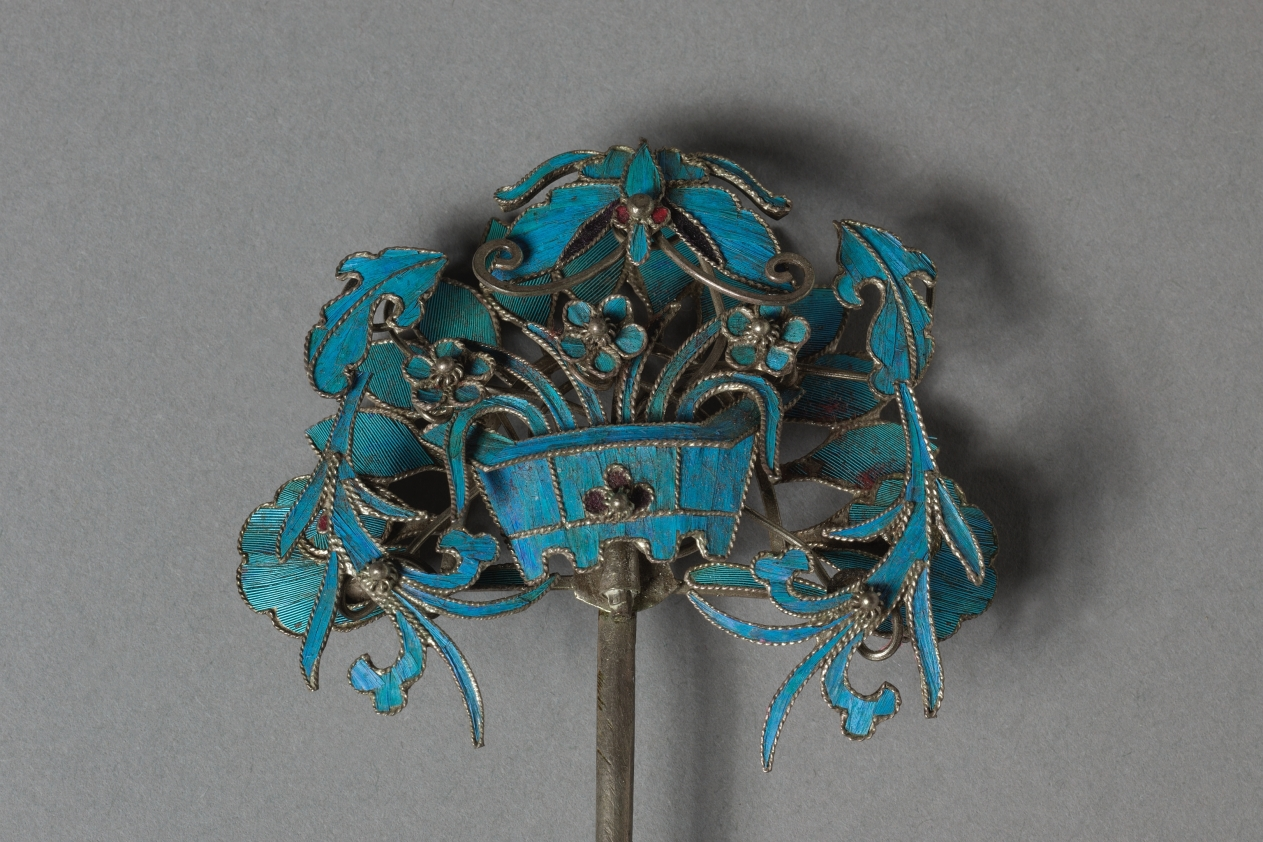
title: Headdress Ornament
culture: China, Qing dynasty (1644-1911)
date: 1800s–1900s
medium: Copper-silver alloy, gilding, kingfisher feathers, glass beads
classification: Jewelry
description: Hair ornaments depicting flowers, butterflies, or birds were worn by ladies of the Manchu elite class.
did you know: The iridescent blue feathers of kingfisher birds are inlaid in hairpins and headdresses.